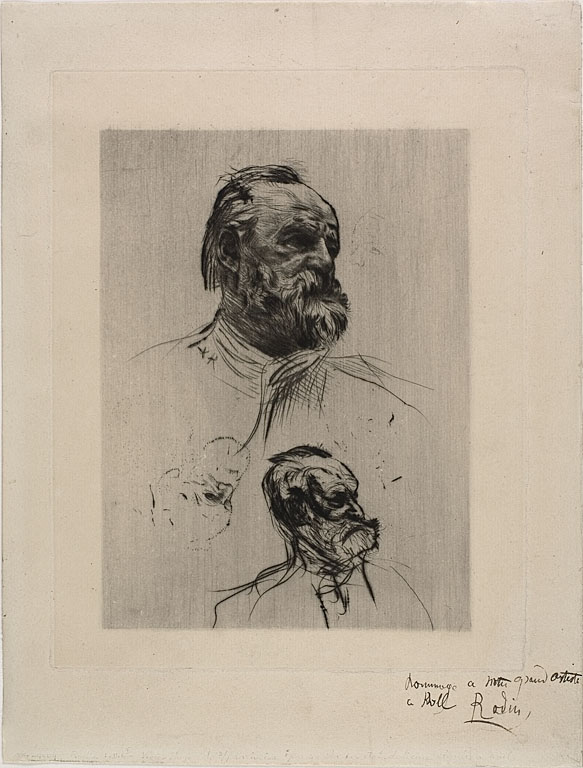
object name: Print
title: Portrait of Victor Hugo, Three-quarter View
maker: Auguste Rodin (French, 1840-1917)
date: 1884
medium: Drypoint on cream laid paper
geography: France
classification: drypoint; print; prints and drawing